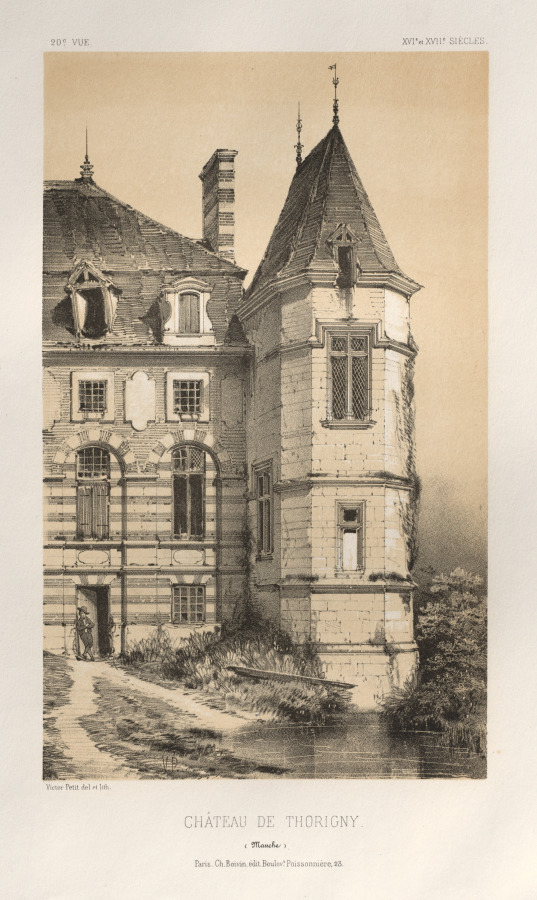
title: Architecture Pittoresque ou Monuments des xveme. Et xvieme. Siecles: Chateaux De France des XV et XVI Siecles: Pl. 20, Chateau De Thorigny (Manche)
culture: France, 19th century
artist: Victor Petit (French, 1817–1874)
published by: Charles Boivin (publisher and editor); Lith de Godard a Paris (printer)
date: published 1860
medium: lithograph with tint stone, from portfolio of 100 lithographs with tint stone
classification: Print